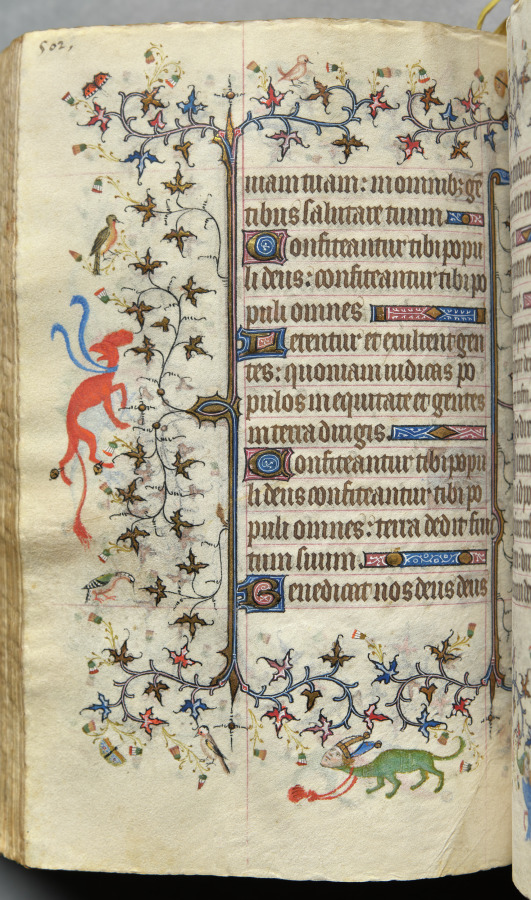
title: Hours of Charles the Noble, King of Navarre (1361-1425): fol. 245v, Text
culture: France, Paris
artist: Master of the Brussels Initials and Associates (French)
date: c. 1405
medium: ink, tempera, and gold on vellum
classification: Bound Volume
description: This precious volume was obviously highly prized by its owner, the French-born King of Navarre, who had his coat of arms painted on no less than twenty folios. Rather than directly commissioning this manuscript from a specific workshop, it seems that Charles the Noble acquired his book of hours -- perhaps ready-made for the luxury market -- while on a trip to Paris in 1404-05. A collaborative effort, six painting styles are evidenced within the pages of this codex, those of two Italians, two Frenchmen, and two Netherlanders. The painter who was responsible for the planning and decoration of the book, and who produced seventeen of the large miniatures, was a Bolognese artist known as the Master of the Brussels Initials. His principal assistant, responsible for most of the borders, was a Florentine who signed his name "Zecho" da Firenze on folio 208 verso.